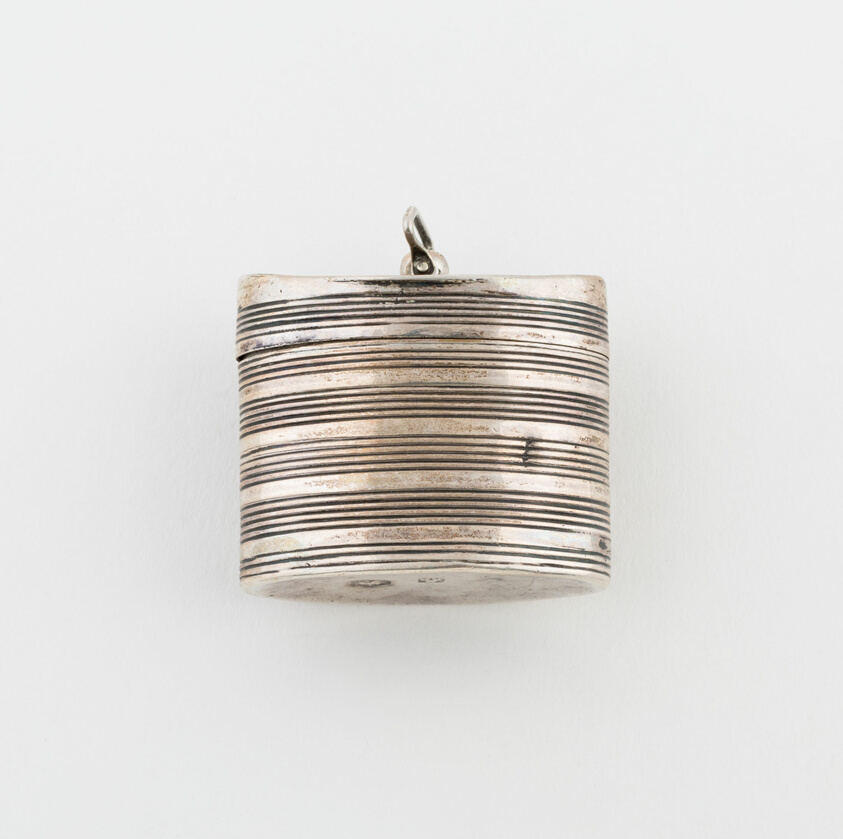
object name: Metalwork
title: Sponge Box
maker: Netherlands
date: c. 1850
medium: Silver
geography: Netherlands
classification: container for personal use; box; european decorative arts; metalwork; silver; decorative object/ornament